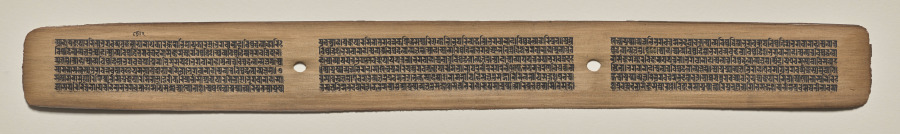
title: Text, Folio 67 (recto), from a Manuscript of the Perfection of Wisdom in Eight Thousand Lines (Ashtasahasrika Prajnaparamita-sutra)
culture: Eastern India, Bihar, Vikramashila Monastery. Painting: Nepal, Kathmandu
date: Sunday, September 14, 1119 (year 239 of the Newar Samvat in the month of Ashvina)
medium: gum tempera and ink on palm leaves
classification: Painting